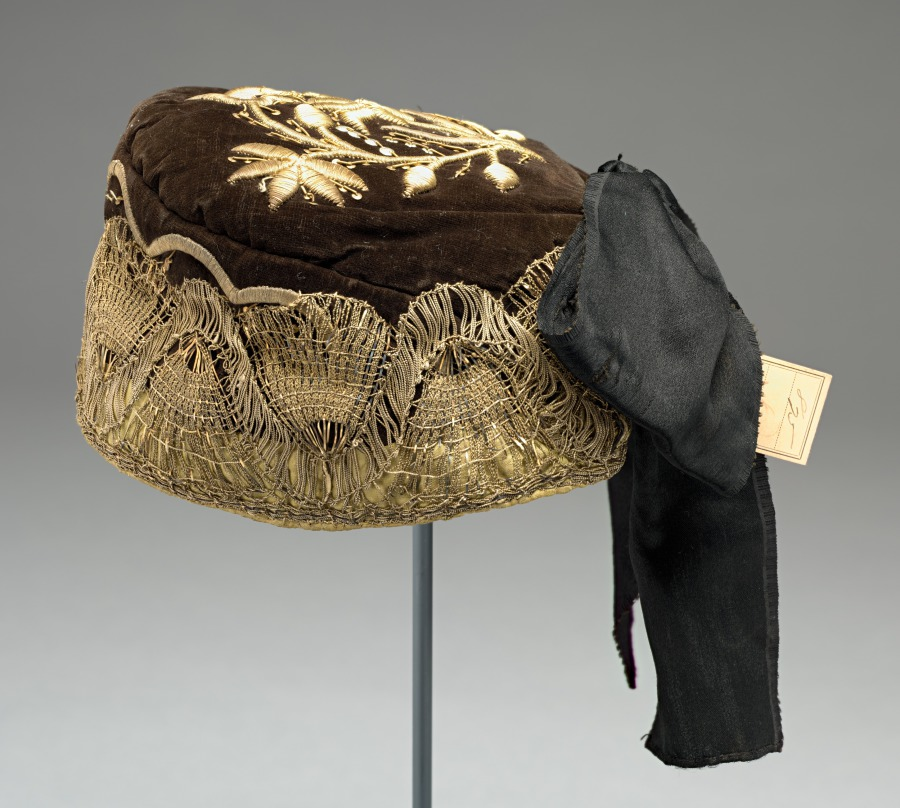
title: Embroidered Headdress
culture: Germany, Schleswig, 18th century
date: 1700s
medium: embroidery, velvet ground embroidered with gold and silver thread; edged with gold lace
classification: Garment